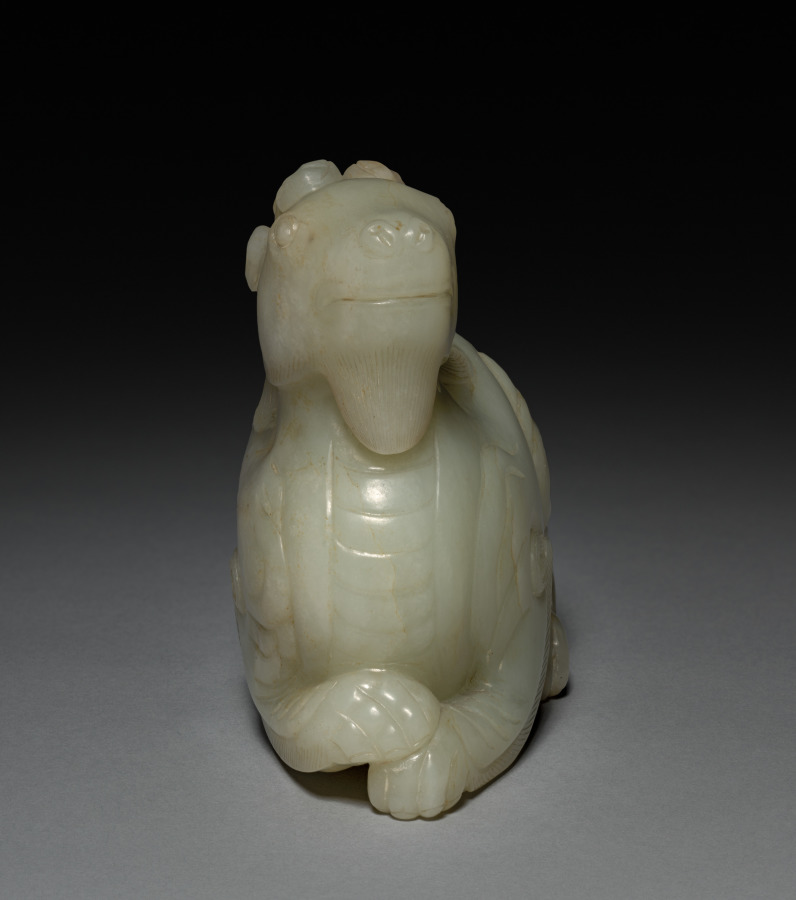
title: Fantastic Animal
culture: China, Qing dynasty (1644-1911)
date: 1700s–1800s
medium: jade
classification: Jade